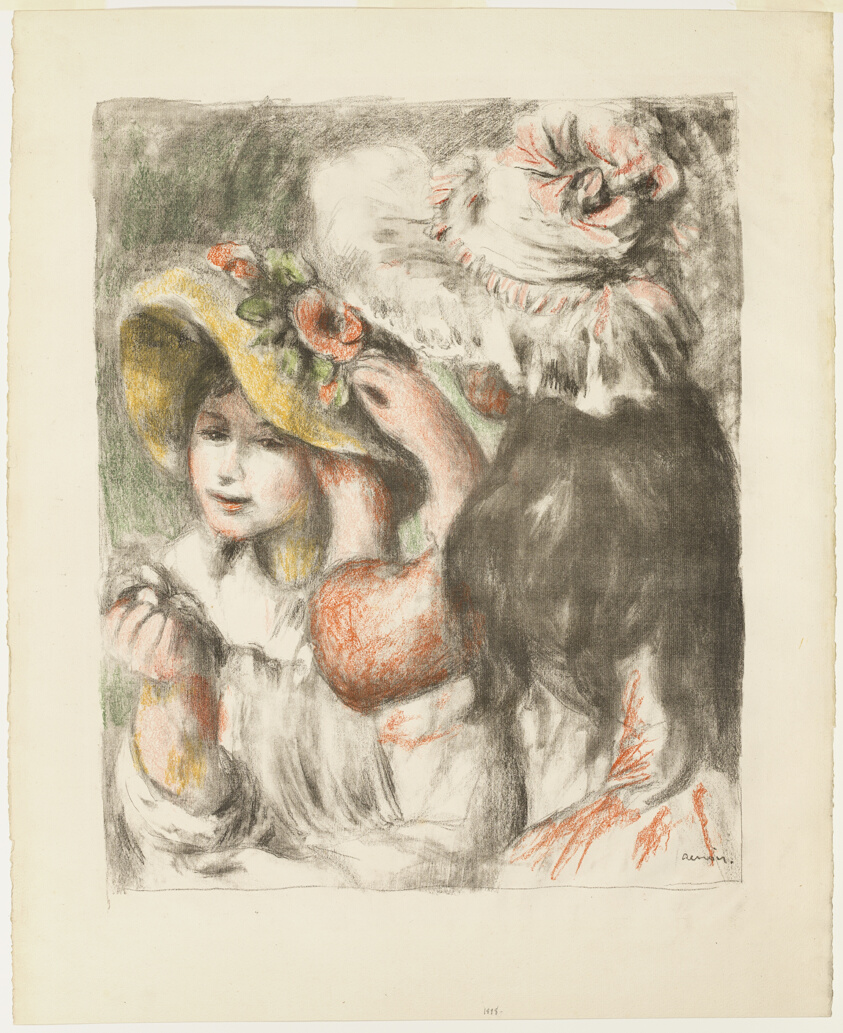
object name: Print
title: Pinning the Hat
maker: Pierre Auguste Renoir (French, 1841-1919); printed by Auguste Clot (French, 1858-1936)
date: 1898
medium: Lithograph from five stones in black, orange, salmon, yellow and green on ivory laid paper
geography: France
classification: lithograph; print; prints and drawing